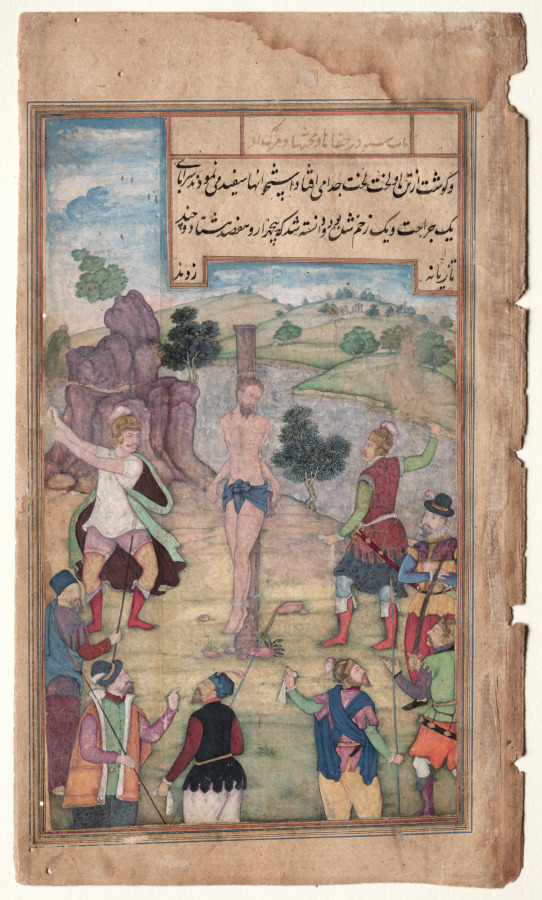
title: The Flagellation (folio 182 recto), from a Mirror of Holiness (Mir’at al-quds) of Father Jerome Xavier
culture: Mughal India, Allahabad, made for Prince Salim (1569–1627)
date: 1602–4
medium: Gum tempera, ink, color, and gold on paper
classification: Manuscript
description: Two Romans flog Jesus, who has been bound to a stake at the center of the circular composition made up of soldiers and the hilly horizon. His subtly articulated expression conveys both pain and compassion, as he endures cuts to his flesh and the bindings around his elbows that secure him so tightly to the post that his feet are elevated off the ground. This is the last illustration in the Cleveland manuscript of the Mirror of Holiness. The Crucifixion was never illustrated, possibly because the patron, Prince Salim, was Muslim. According to the Koran, Jesus did not die on the cross, but was absorbed into heaven by Allah.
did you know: A halo encircles Jesus’s head, and his hair and beard are highlighted with gold.